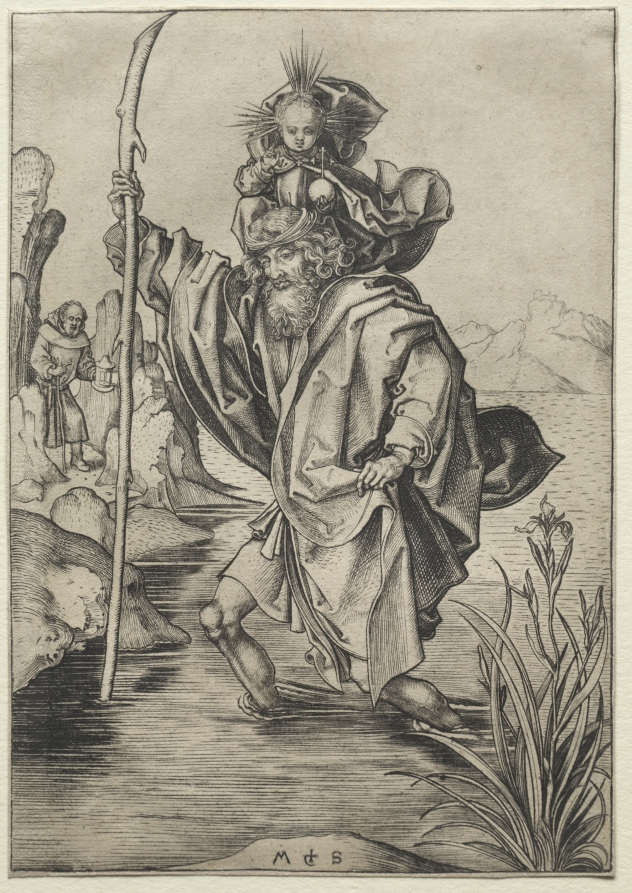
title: St. Christopher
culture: Germany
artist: Martin Schongauer (German, c. 1450–1491)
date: 1475–80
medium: engraving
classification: Print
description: One of the most popular saints in the Late Middle Ages, Saint Christopher—whose name means "Christ-bearer"—was the patron saint of travelers and pilgrims. A legendary giant, Christopher wished to serve the most powerful king in the world. A hermit advised him to devote his life to Christ and to carry pilgrims and travelers on his back across a dangerous river, guided by the light of the hermit's lantern. Here, Schongauer depicts the story, focusing on the moment before the saint reaches the shore with the child on his back. According to legend, when the saint finally reached the far shore, he exclaimed that he felt he had carried the whole weight of the world on his back. Here, the cruciform rays of light around the child's head reveal him as Christ.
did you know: Prints depicting St. Christopher were believed to protect from the mala mors (dying suddenly without receiving the last rites), which was of particular concern to pilgrims and travelers.